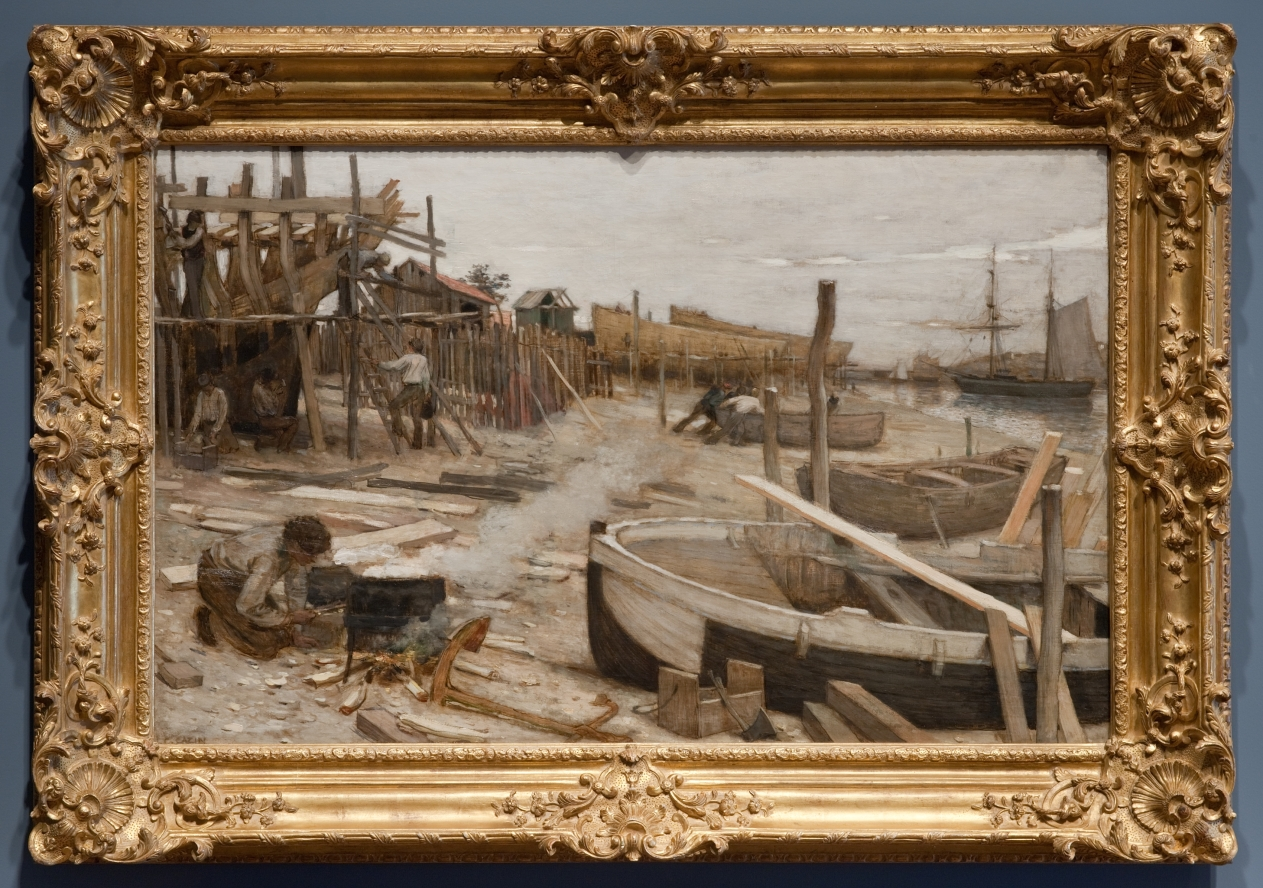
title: The Boatyard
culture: France, 19th century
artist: Jean-Charles Cazin (French, 1841–1901)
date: c. 1875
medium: oil on fabric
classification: Painting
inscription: Signed lower left: c. cazin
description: Cazin exhibited this painting at the Paris Salon of 1876, marking the start of his official career. It depicts a boatyard in the artist's native Boulogne, a port city on the English Channel. The young man in the foreground is melting tar at a smoky fire, while men work on a boat just above him. Cazin was associated with the Realist movement during his early years and later with the Impressionists.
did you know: This painting was submitted to the Paris Salon in 1876 as Cazin’s first major work.